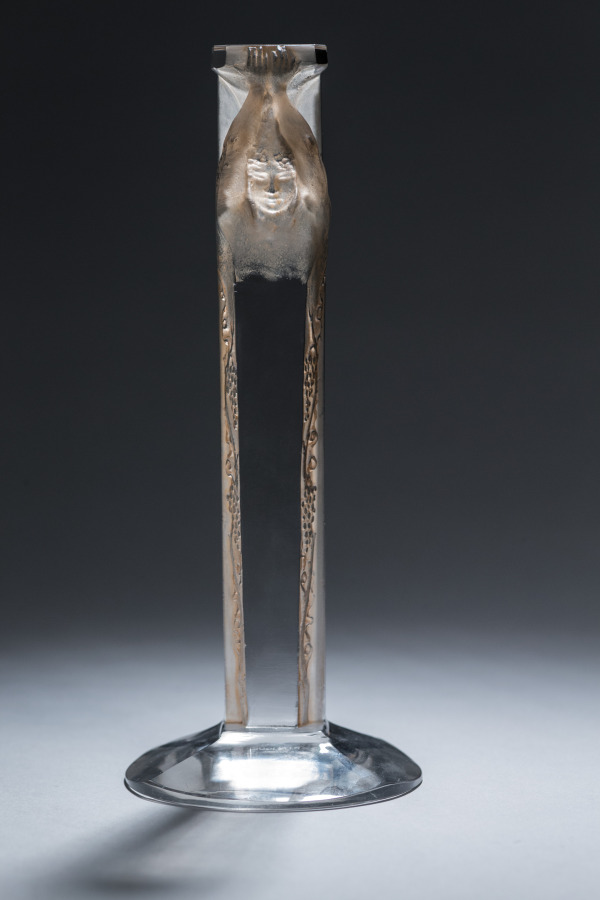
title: Bacchus Figural Centerpiece Support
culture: France, 20th century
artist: René Lalique (French, 1860–1945)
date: 1923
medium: Cast and patinated glass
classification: Glass